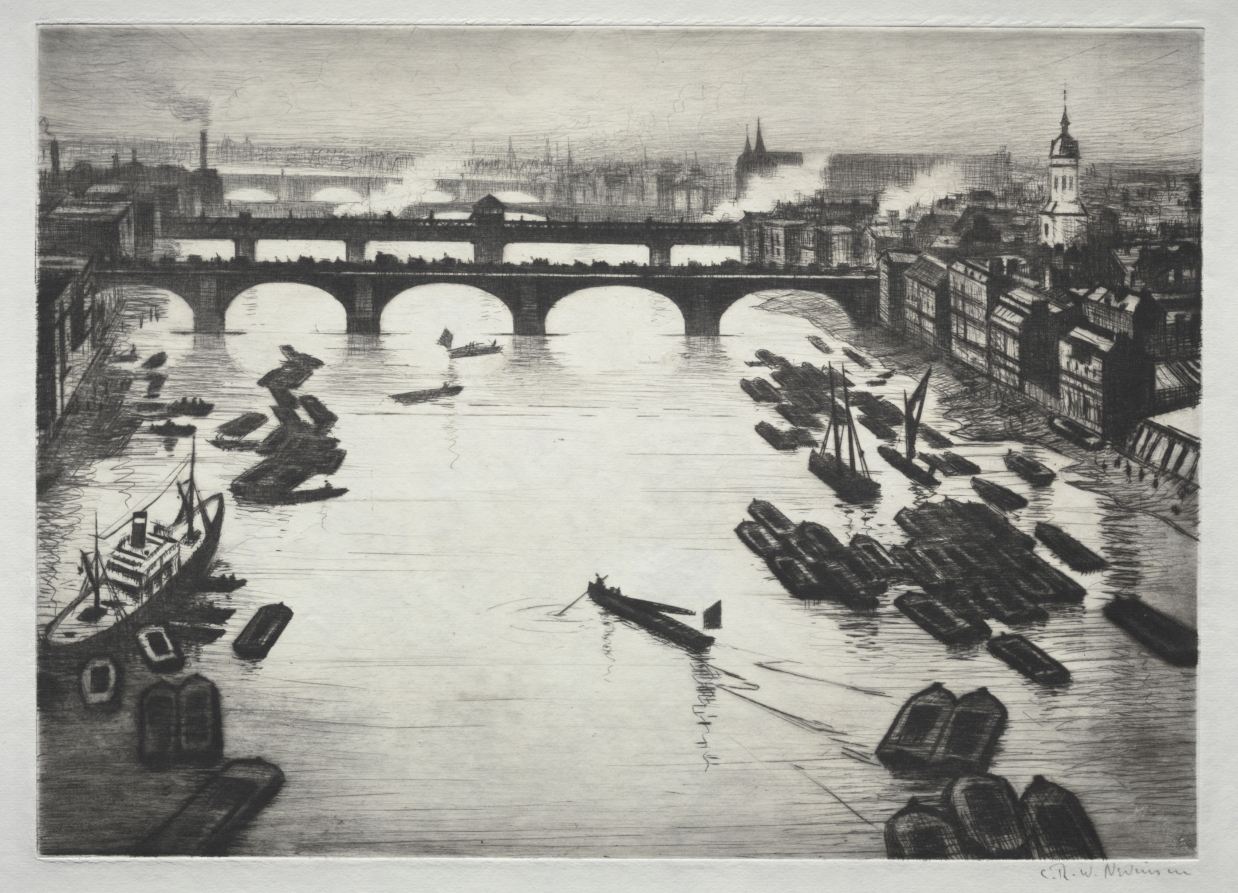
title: London Bridges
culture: England, 20th century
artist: Christopher Nevinson (British, 1889–1946)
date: 1924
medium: drypoint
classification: Print